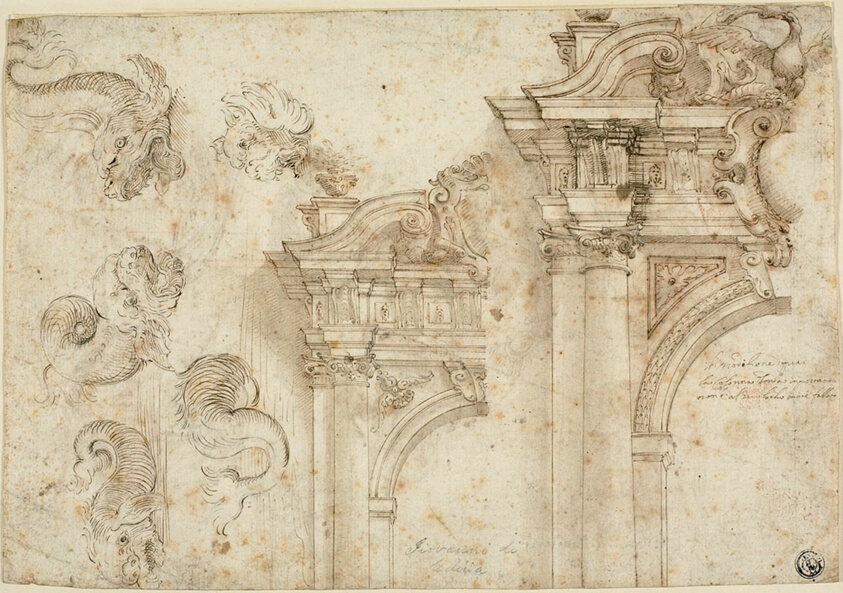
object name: Drawing and Watercolor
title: Sheet of Sketches: Sea Monsters and Elaborate Portals (recto); Sketches of Architectural Details (verso)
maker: Attributed to Agostino Mitelli; Italian, 1609–1660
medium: Pen and brown ink, with brush and gray wash and traces of red chalk (recto), and pen and brown ink (verso), on ivory laid paper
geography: Italy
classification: pen and ink drawings; drawings (visual works); prints and drawing